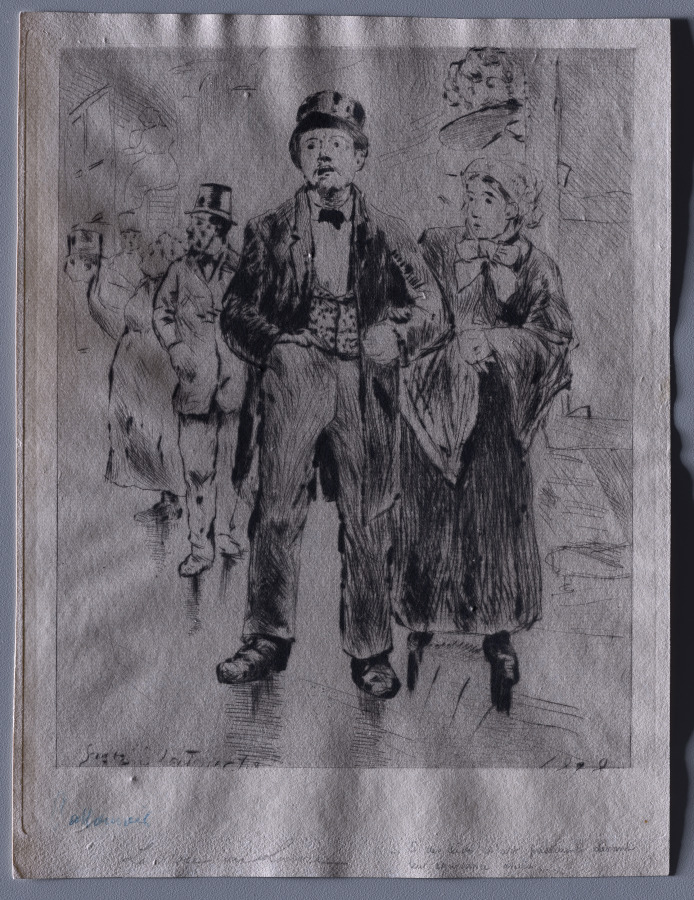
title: Wedding at the Louvre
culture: France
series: L'Assommoir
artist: Gaston de Latouche (French, 1854–1913)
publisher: Cadart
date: 1878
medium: drypoint on laid paper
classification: Print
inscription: Signed, in plate, at lower left: Gaston La Touche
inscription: inscribed, in plate, at lower right: 1878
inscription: inscribed, in blue pencil, at lower left: l’assommoir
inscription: in pencil, at lower left: La noce au Louvre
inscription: in pencil, at lower right: …Et des siècles d’art passaient devant / leur ignorance ahurie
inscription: Watermark: D.C. BLAUW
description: Although his work changed throughout his career, early on Gaston La Touche belonged loosely to the Impressionist circle through his association with Édouard Manet. La Touche explored subjects—such as that seen here—taken from the lives of working-class Parisians. This print represents a scene from naturalist author Émile Zola’s novel L’Assommoir, which detailed the rise and fall of a laundress named Gervaise. La Touche is said to have collaborated with the author on the imagery and exhibited the entire series at the public Paris Salon in 1879.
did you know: Gaston La Touche completely changed the subjects and style of his work around 1890 and destroyed much of his early work.